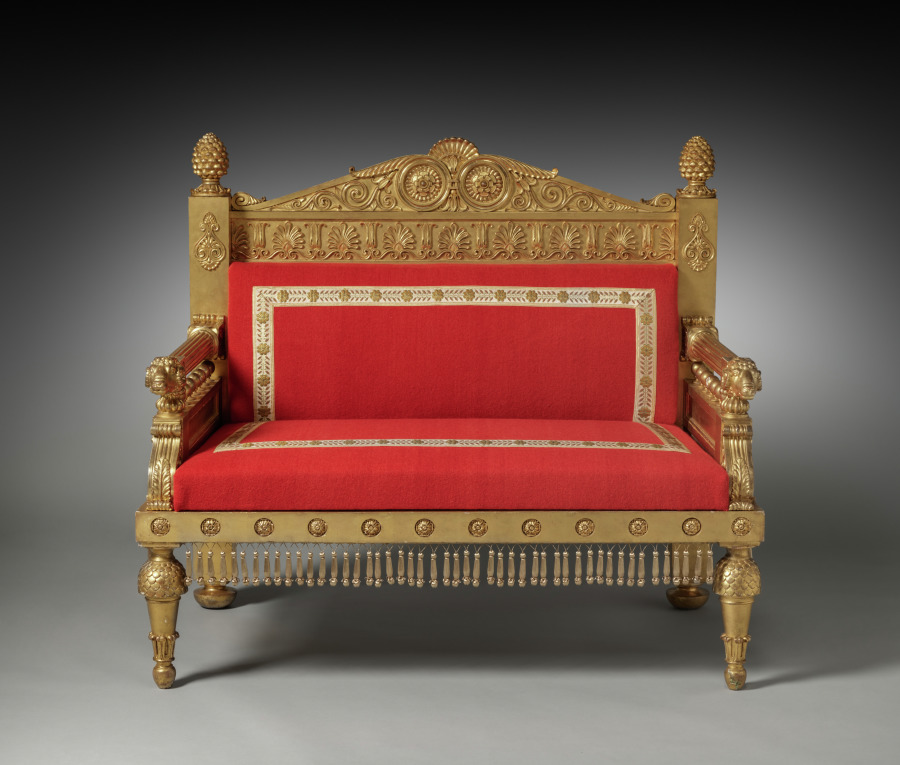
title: Settee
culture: England, 19th century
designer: Thomas Hope (British, 1769–1831)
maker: Unknown Maker (British)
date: c. 1802–07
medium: gilt-wood, reproduction wool upholstery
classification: Wood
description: An art collector, designer, and champion of neoclassicism, Thomas Hope designed this settee for display in his London house. Hope’s design exemplifies the continued interest in neoclassical ornament around 1800 through the use of elaborately carved friezes, a central pediment, and a lavishly gilded surface. In 1807 Hope published Household Furniture and Interior Decoration, featuring descriptions of his renowned collection of antiquities and the interior furnishings from his London house, including this settee. Many architects and cabinetmaking firms took inspiration from Hope’s designs, adapting Greek and Roman forms to create bold expressions of neoclassicism in their architecture and decoration.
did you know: The acorn finials, ram’s heads, and clusters of stylized honeysuckle flowers along the settee’s frame are typical of Thomas Hope’s neoclassical designs.